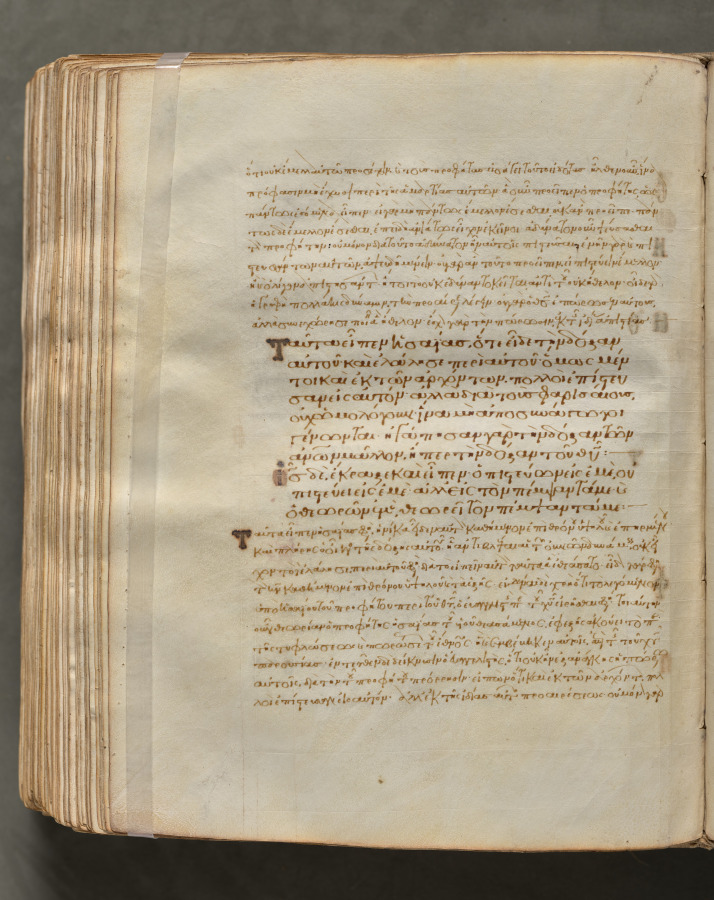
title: Text, folio 386 (verso), from a Gospel Book with Commentaries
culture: Byzantium, Constantinople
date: c. 1000–1100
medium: ink, tempera, and gold on vellum; leather binding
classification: Bound Volume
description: Each of the four gospels in this book opens on a page with brilliantly illuminated borders depicting the author of the text as well as birds—principally peacocks, symbols of the immortality of the soul—and fountains, representing the fountain of life and the salvation of the soul. This volume consists of 428 leaves with texts in Greek. Its level of sophistication suggests that it was probably written and decorated in a monastery in Constantinople.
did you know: Gospel books were carried in procession through Byzantine churches.